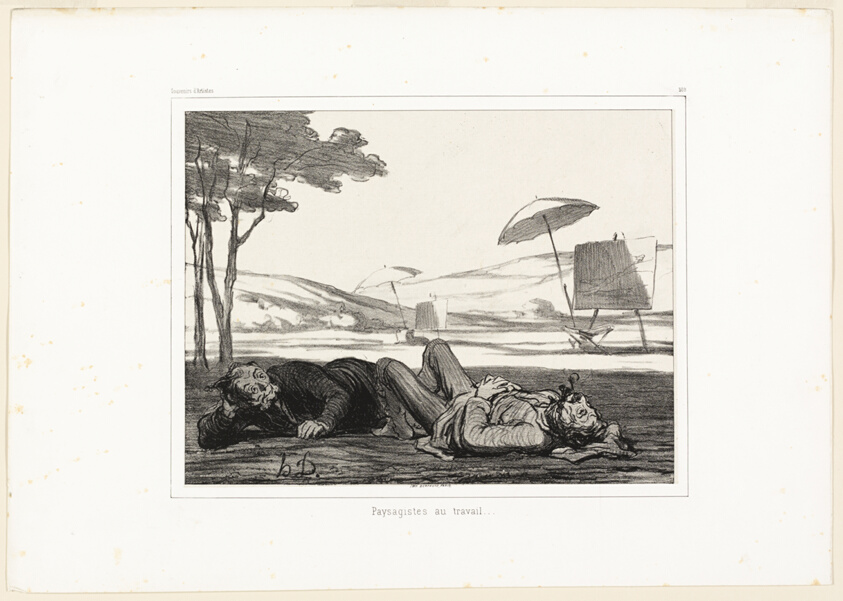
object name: Print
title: Landscape Painters at Work, plate 309 from Souvenirs d'artistes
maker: Honoré Victorin Daumier; French, 1808-1879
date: 1862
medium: Lithograph on ivory Japanese paper, laid down on ivory wove paper (chine collé)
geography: France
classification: lithograph; print; prints and drawing